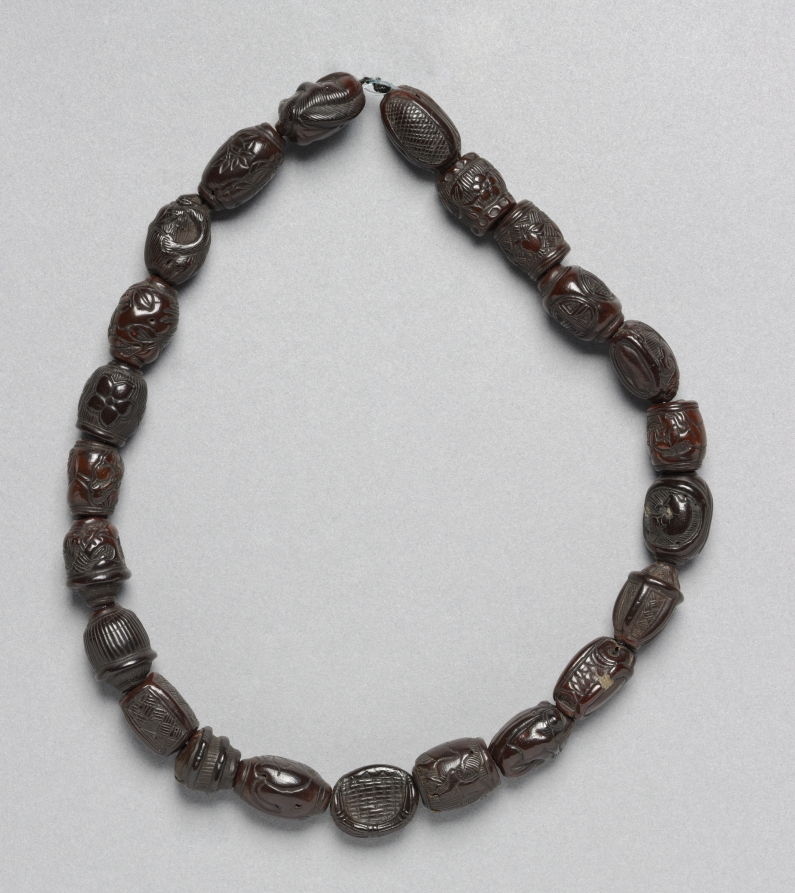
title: String for Men's Hat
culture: Korea, Joseon dynasty (1392–1910)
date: 1800s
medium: Wood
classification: Jewelry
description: Made of either agarwood or red sandalwood, this bead string was once attached to a man's hat called a gat. Each bead bears an inscribed image of fish, birds, frogs, flowers, a boy holding a peach, and some characters of auspicious meanings such as longevity and good fortune.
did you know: This bead string was attached to men's hats called a gat during the Joseon period.